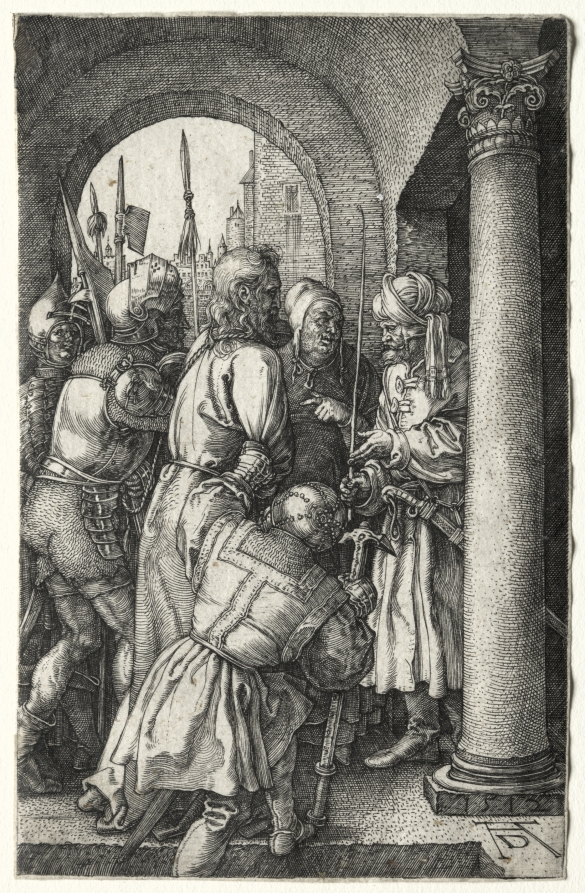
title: Christ Taken before Pilate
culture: Germany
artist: Albrecht Dürer (German, 1471–1528)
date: 1512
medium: engraving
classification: Print